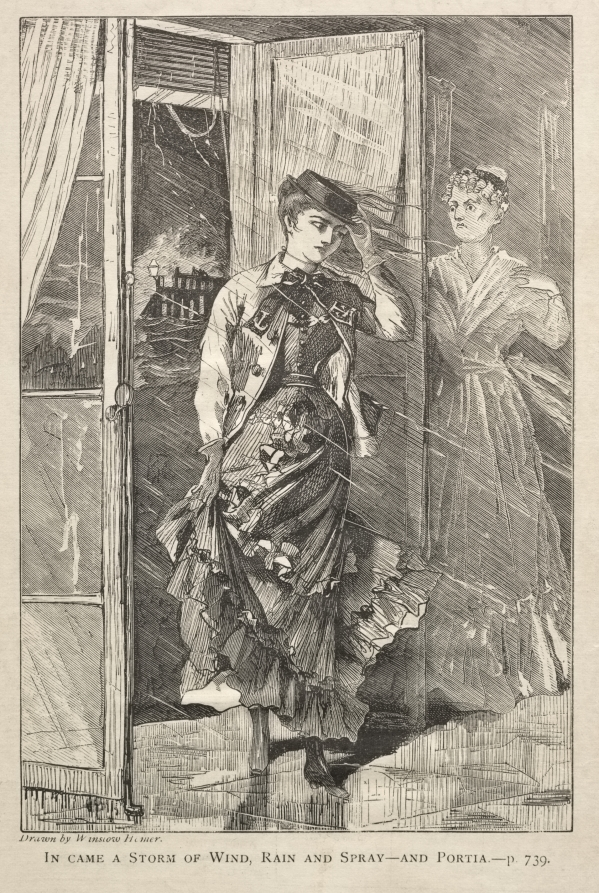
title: In Came a Storm of Wind, Rain and Spray - and Portia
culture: America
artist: Winslow Homer (American, 1836–1910)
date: 1869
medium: wood engraving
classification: Print